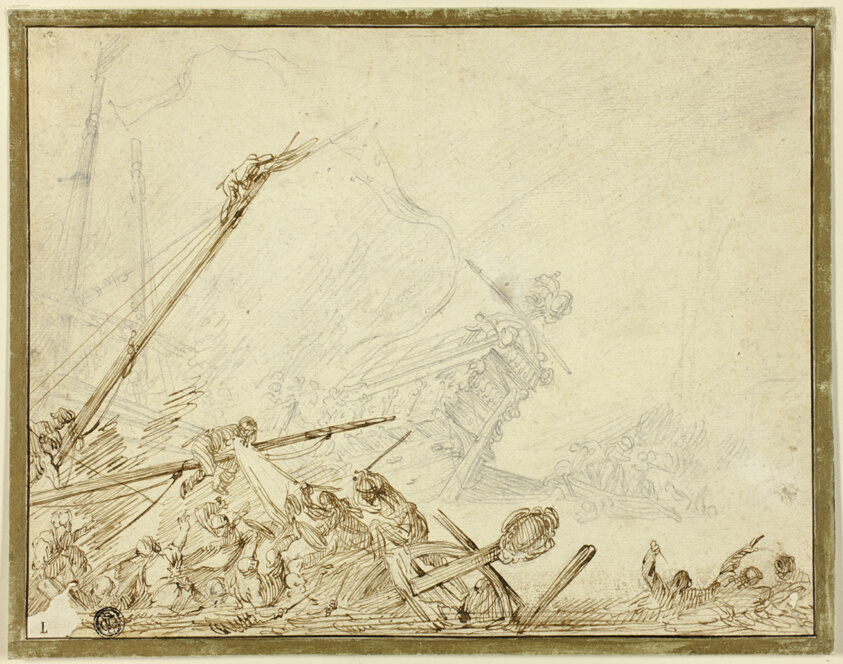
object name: Drawing and Watercolor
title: Shipwreck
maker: Cornelis de Wael (Flemish, 1592-1667)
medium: Graphite and pen and brown ink, on ivory laid paper, laid down on card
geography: Italy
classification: pen and ink drawings; drawings (visual works); prints and drawing